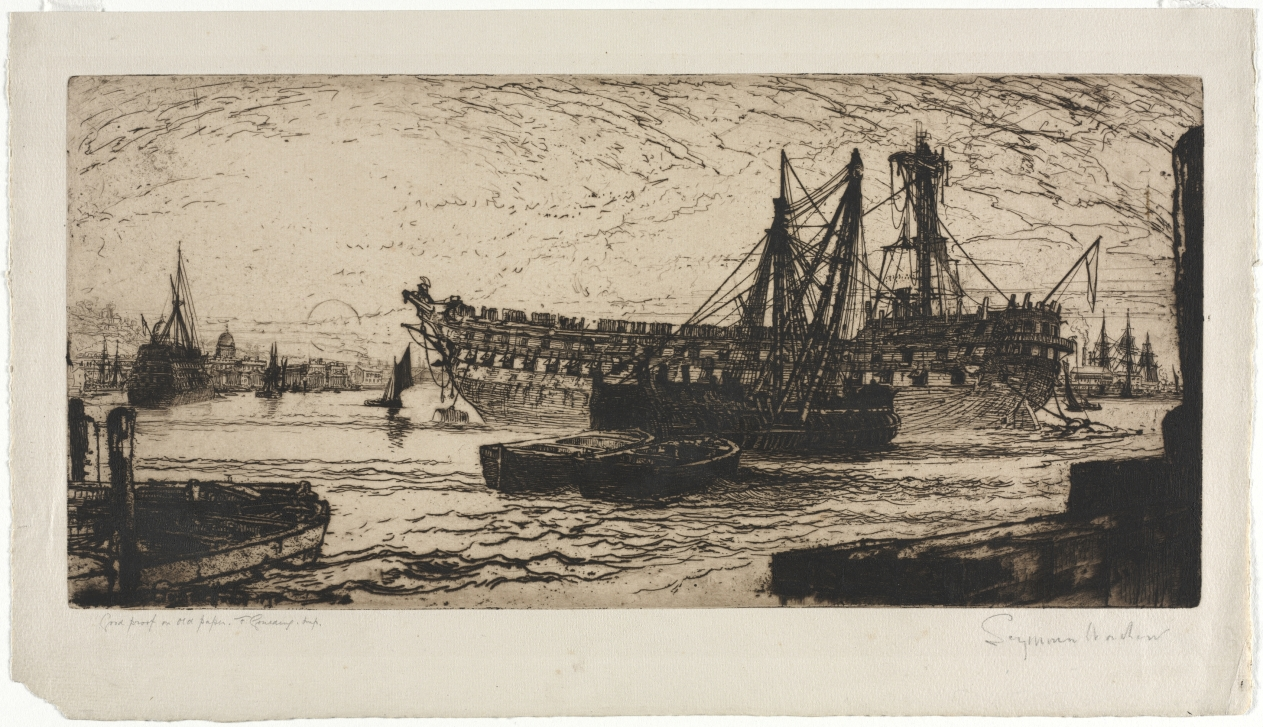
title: Breaking up of the Agamemnon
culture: England, 19th century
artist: Francis Seymour Haden (British, 1818–1910)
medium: etching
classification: Print